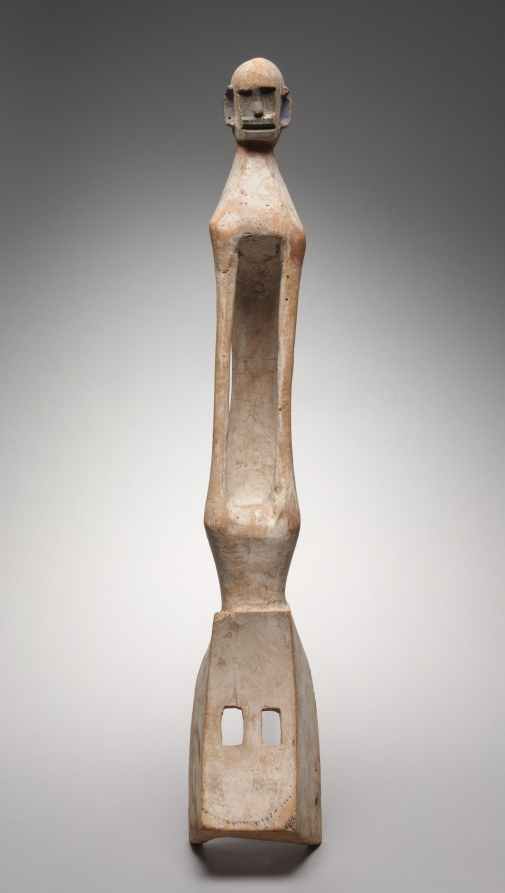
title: Mask (Omono or Tana Wurum Bogoro)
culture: Africa, West Africa, Mali, Dogon-style blacksmith-carver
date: early 1900s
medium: Wood and paint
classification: Mask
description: Dogon masks can be interpreted on two fundamentally different levels: “front speech” (giri so) reflects an early stage of knowledge and consists of a tale that is intended to arouse curiosity; and “speech of the world” (aduno so) refers to Dogon cosmogony, reserved for highly instructed men and women. Masked dances have recently been organized in Dogon regions for tourists and dignitaries. The character of omono is a rare one among the 80 or so that appear in Dogon masquerades.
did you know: The long-armed figure at the top of this mask is omono, a white-bellied monkey.